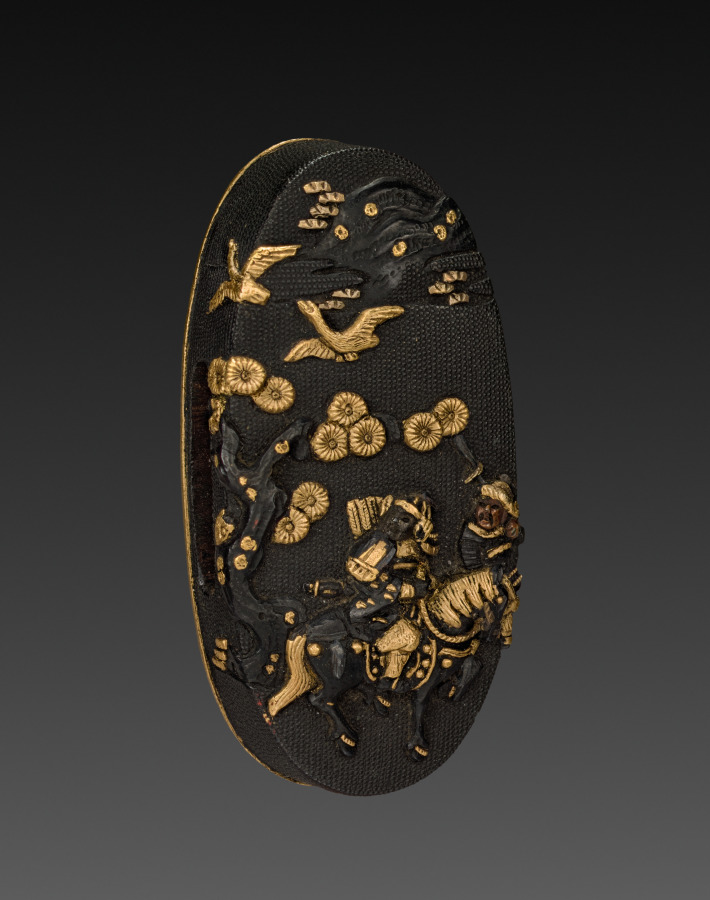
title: Sword-Hilt Pommel (Kashira)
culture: Japan, Edo period (1615–1868)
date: 1700–1850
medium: shakudo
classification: Arms and Armor